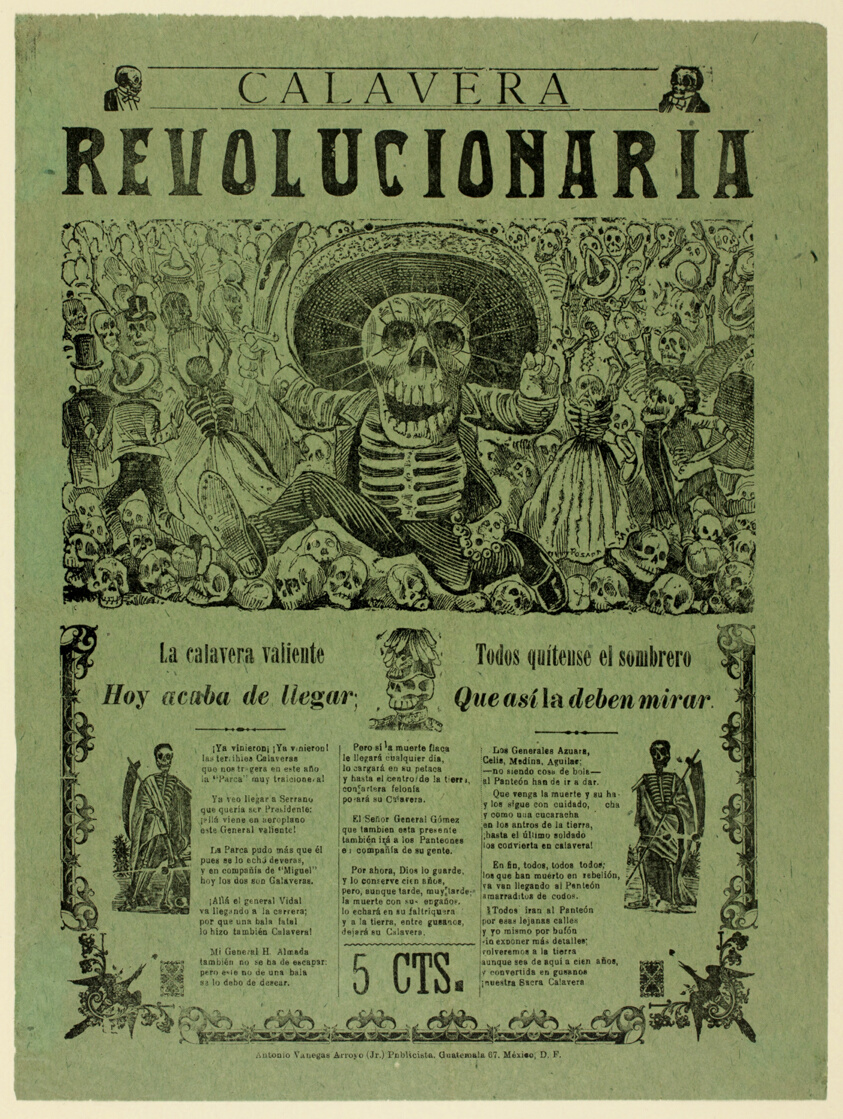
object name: Print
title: Revolutionary Calavera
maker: José Guadalupe Posada (Mexican, 1852-1913)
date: c. 1910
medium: Photo-relief etching (drawing style) in black on green wove paper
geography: Mexico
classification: relief etching; print; prints and drawing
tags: text